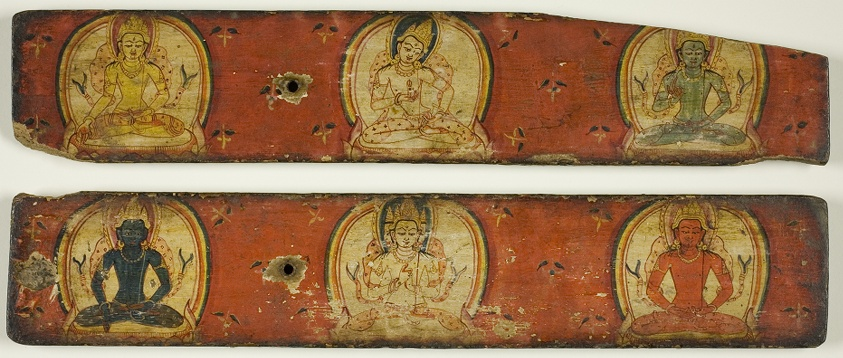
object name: Religious/Ritual Object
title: One of a Pair of Manuscript Covers of the Five Transcendent Buddhas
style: Himalayan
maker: Nepal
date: 12th century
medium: Pigments and metallic paint on wood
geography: Nepal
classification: manuscript; ritual objects